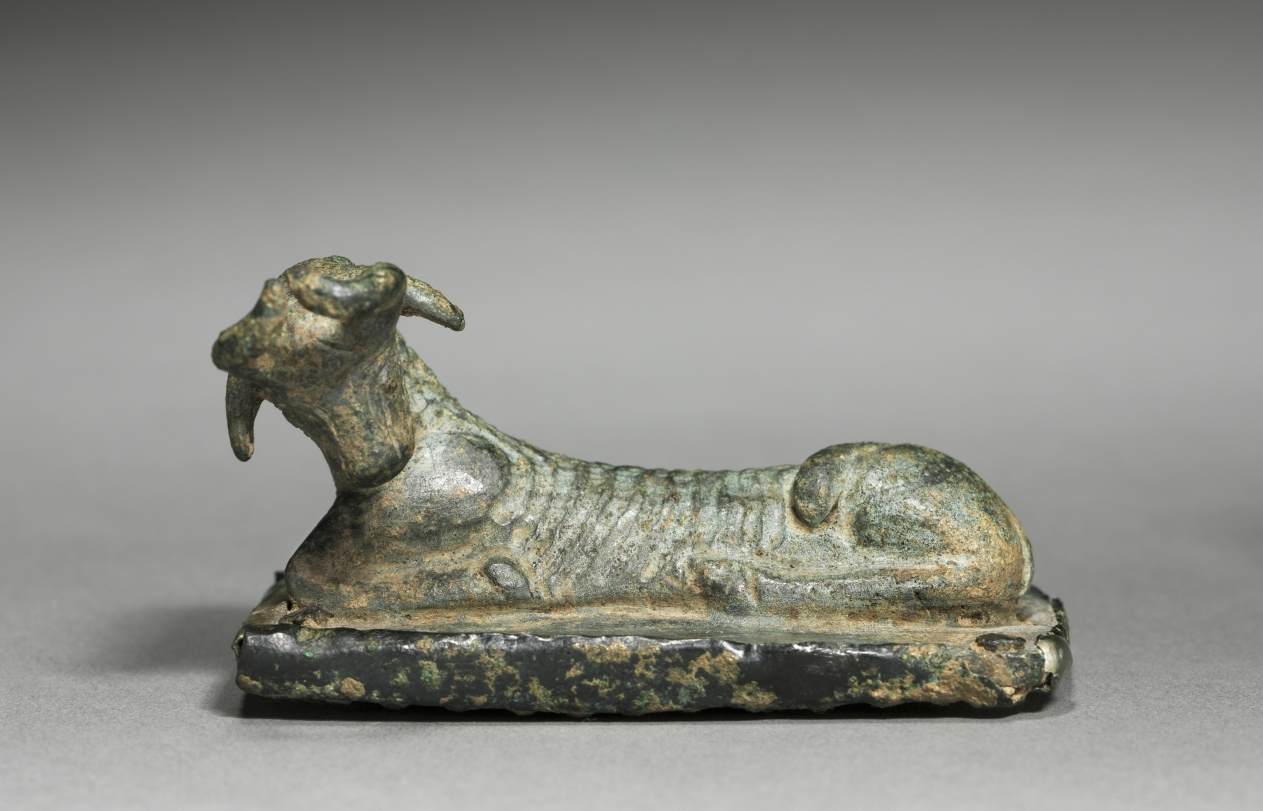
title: Recumbent Animal on Grater or Scraper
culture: Greece or Anatolia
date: 700–500 BCE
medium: bronze with iron grating plate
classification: Sculpture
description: An emaciated bull (or perhaps goat) lying on the ground, his legs tucked under in a resting position, may constitute a handle for this unusual object—likely a grater or scraper, judging from the perforated metal plate on its underside. The anatomically curious ridges across the neck and torso of the animal, as well as the large horned head turned perpendicular to the body, may have helped the owner grip the object while in use.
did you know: The exact use of this enigmatic object remains unknown.